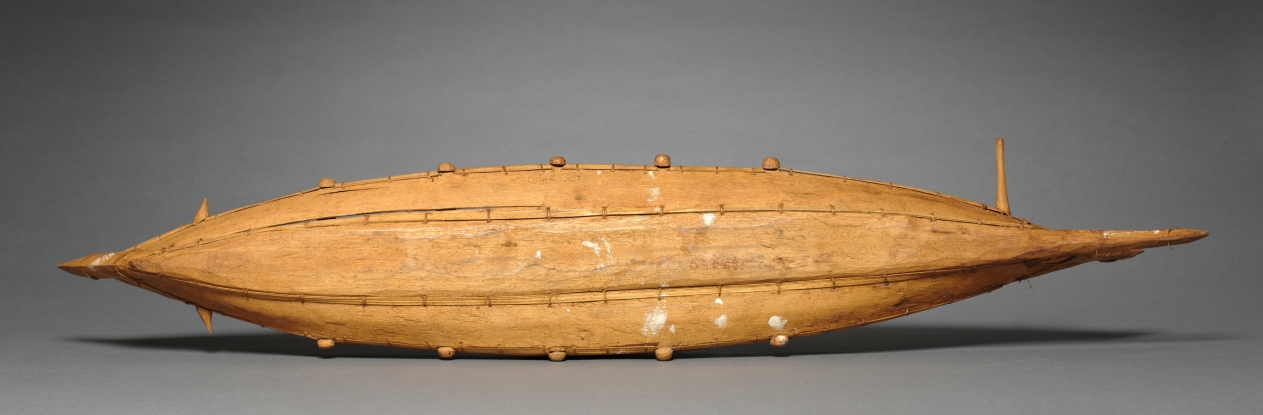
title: Model Canoe and Paddles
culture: Africa, East Africa, probably Uganda, unknown maker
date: 1900s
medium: wood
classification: Furniture and woodwork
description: Made of plain wood, this is a model of a canoe with a prow, seats, and five paddles. Composed of multiple panels sewn together with fibers, it was described in historical museum documents as a "war canoe." Similar examples from around the same period are found in American and European museums, where they had been collected in eastern, central, and western Africa as anthropological artifacts rather than as artworks. While the archives have little information about this object, it appears similar to Ugandan sewn plank canoes and to a model example collected in Uganda between 1890 and 1910 now at the British Museum.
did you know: The small scale and a 1929 description of this object as "modern" suggest it was made for tourists.